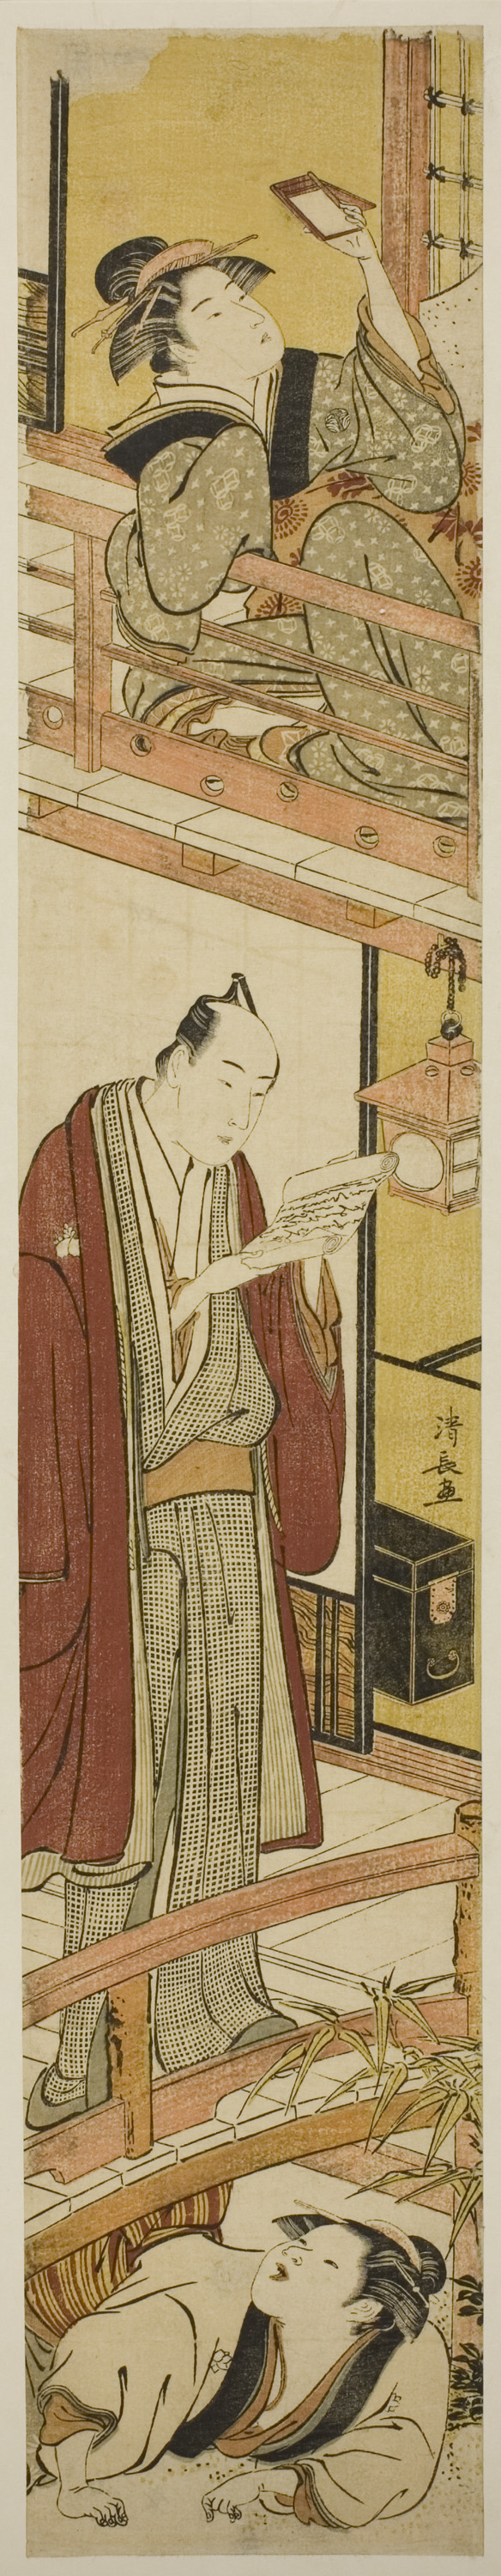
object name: Print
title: Parody of act VII of the play "Treasury of Loyal Retainers (Chushingura)"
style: Japanese (culture or style)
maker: Torii Kiyonaga (Japanese, 1752-1815)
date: c. 1782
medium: Color woodblock print; hashira-e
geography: Japan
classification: woodblock print; print; asian art